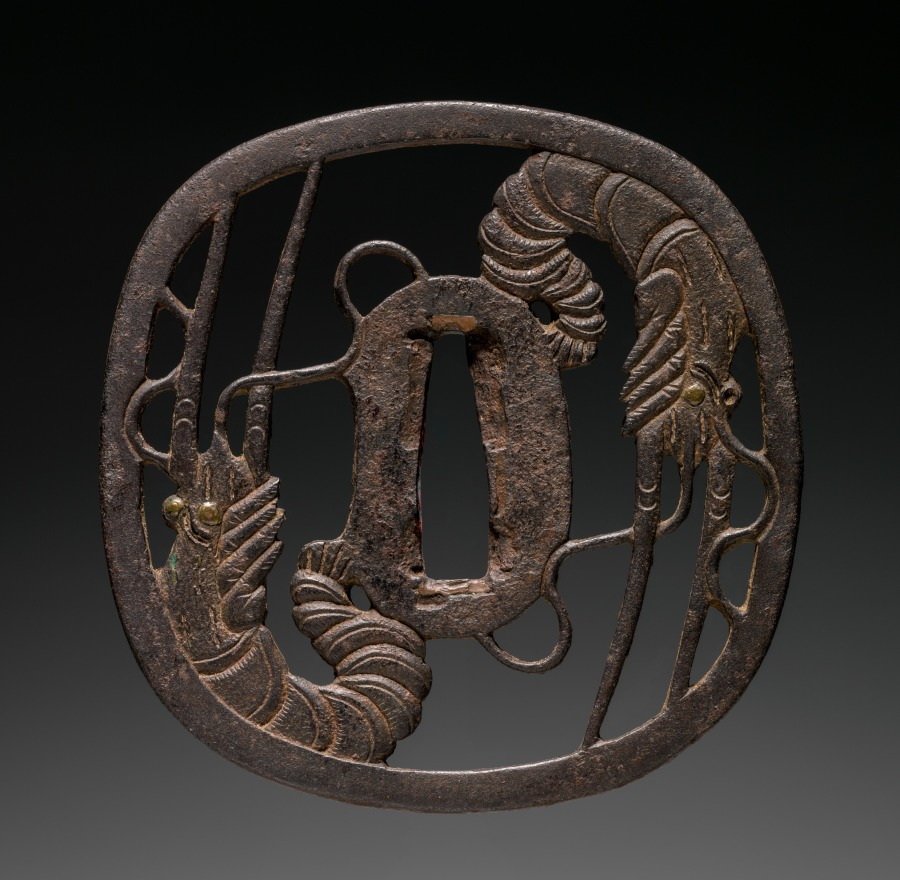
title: Sword Guard (Tsuba) with Prawns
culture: Japan, possibly Edo period (1615-1868)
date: c. 1615–1868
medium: iron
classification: Arms and Armor